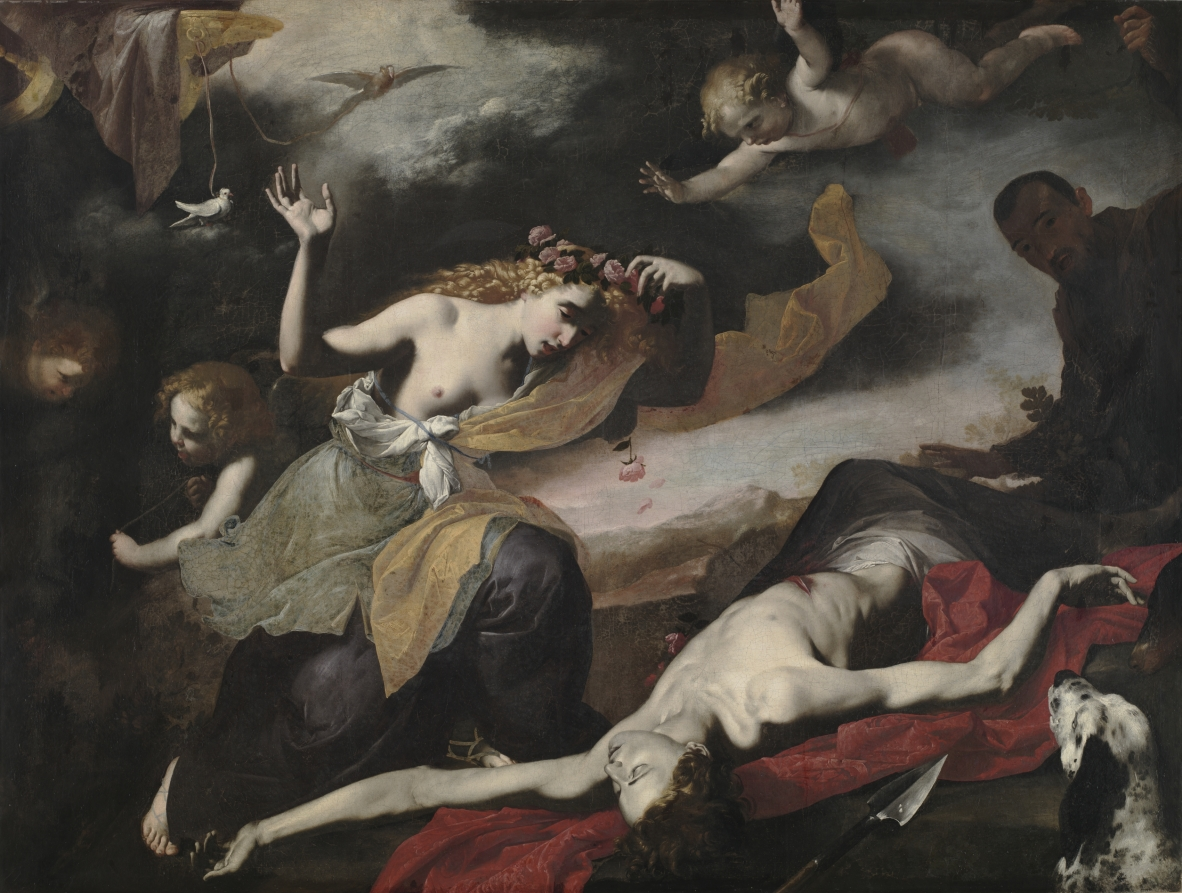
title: Venus Discovering the Dead Adonis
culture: Italy, Naples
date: c. 1650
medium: oil on canvas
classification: Painting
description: Venus, the goddess of love, urged her mortal lover Adonis to hunt only the easiest game. Yet he insisted on pursuing boar, which eventually gored him to death. In this scene, Venus discovers the young man robbed of his youth, yet the painting eternally preserves him in a state of perfection. This paradox corresponds to wordplay in Italian poetry from the 1600s, with which many artists sought visual parallels in their work. This painting derives from a 1623 poem by Giovanni Battista Marino. The painter remains unknown, although the sophisticated literary reference, dramatic use of light, and vivid use of color demonstrate the artist’s awareness of trends converging in Naples in the mid-1600s.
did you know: At left, two putti use a rope to restrain the boar that has just killed Adonis.